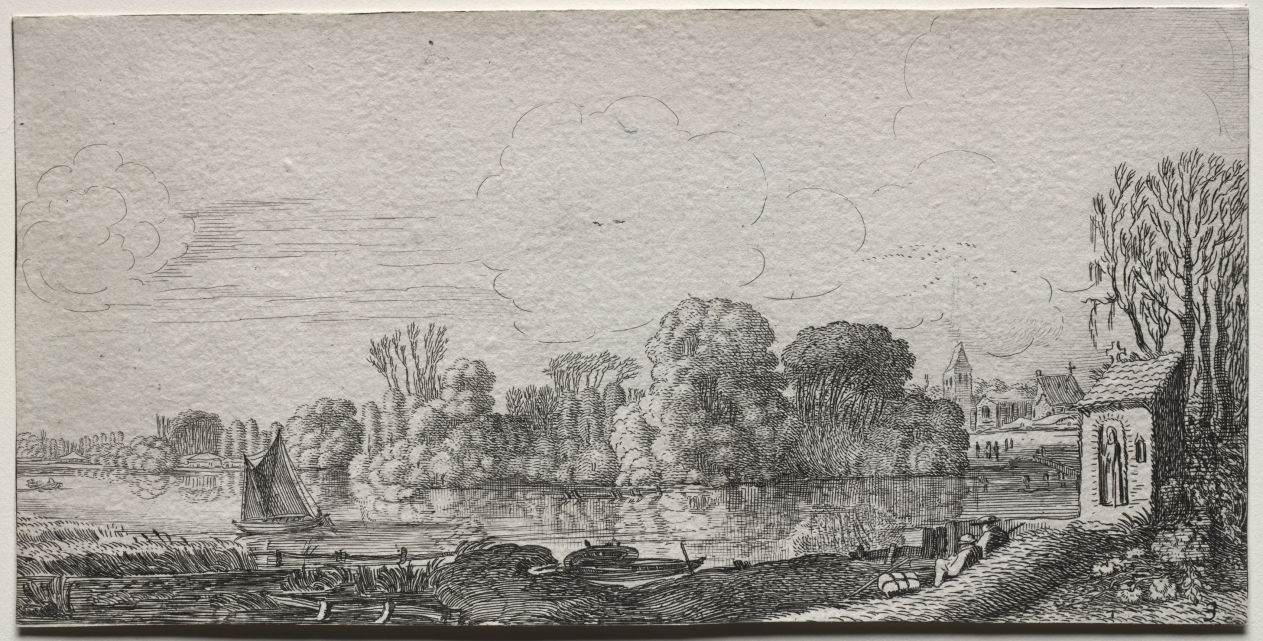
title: Landscapes: A Little Chapel by a Pond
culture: Netherlands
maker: Jan van de Velde II (Dutch, 1593–1641)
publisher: Claes Jansz Visscher (Dutch, 1586/87–1652)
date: 1615–52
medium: etching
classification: Print